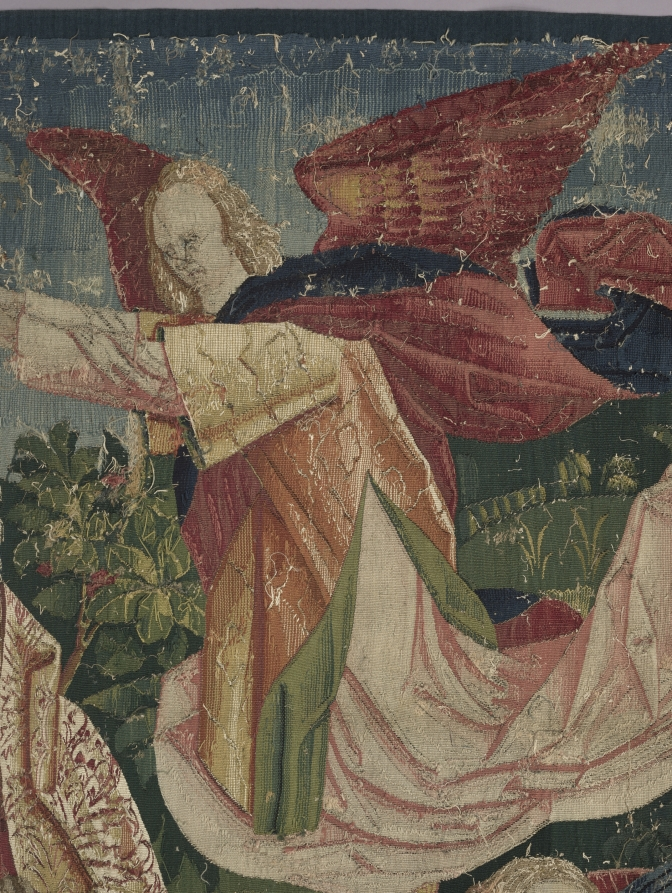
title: The Triumph of Eternity (from Chateau de Chaumont set)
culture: France, Lyon(?), early 16th century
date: 1512–15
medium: silk and wool; tapestry weave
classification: Tapestry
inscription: French verse in Gothic letters translates as follows: "Nothing triumphs by right authority, Unless it be conducted by Eternity. Nothing is permanent beneath the firmament, But above us triumphs Eternity."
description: The Triumph of Eternity is represented by the Coronation of the Virgin. Dressed in crimson velvet with an opulent brocaded velvet shawl, the Virgin is seated in the center as two angels hold a crown over her head. Five musical angels surround her playing an organ, recorder, straight cornetto, harp, and lute, while another sings from an open music book. The scenes in the set display a conservative style in which the figures are placed in shallow landscapes, thereby ignoring pictorial innovations for depicting space and mass. The verse in Old French at the top states: Nothing triumphing by due authority Remains permanent and durable. Nothing is permanent under the heavens, But above, eternity triumphs.